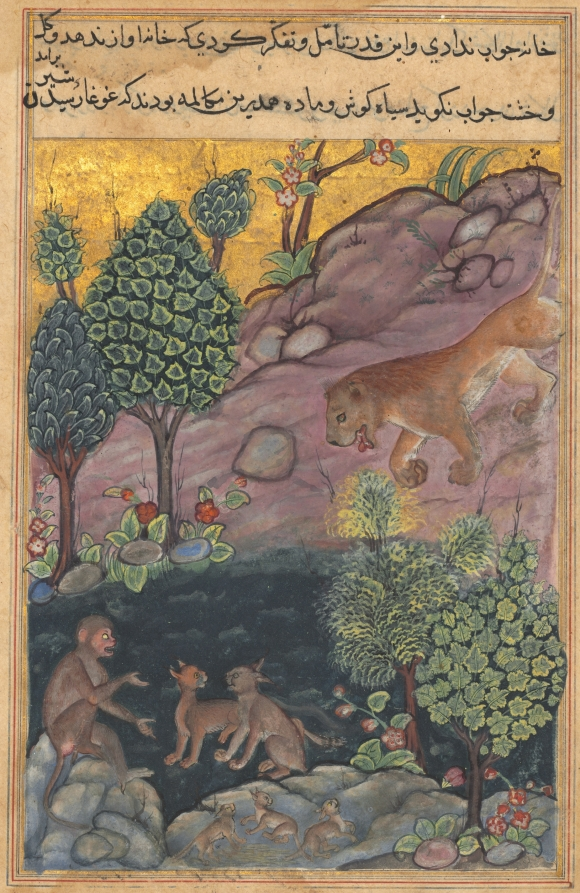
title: The lion returns to his territory and sees the monkey conversing with the lynx, from a Tuti-nama (Tales of a Parrot): Twenty-ninth Night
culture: Mughal India, court of Akbar (reigned 1556–1605)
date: c. 1560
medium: gum tempera, ink, and gold on paper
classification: Painting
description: The lion who rules the meadow returns from a journey to find that his home has been invaded by a family of lynx, who claim that they are its rightful owners. Although this painting depicts all of the animals together, in the text, the lion does not see the lynx and is easily tricked into believing they are fearsome creatures.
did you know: The monkey bares his teeth and gesticulates when he talks.